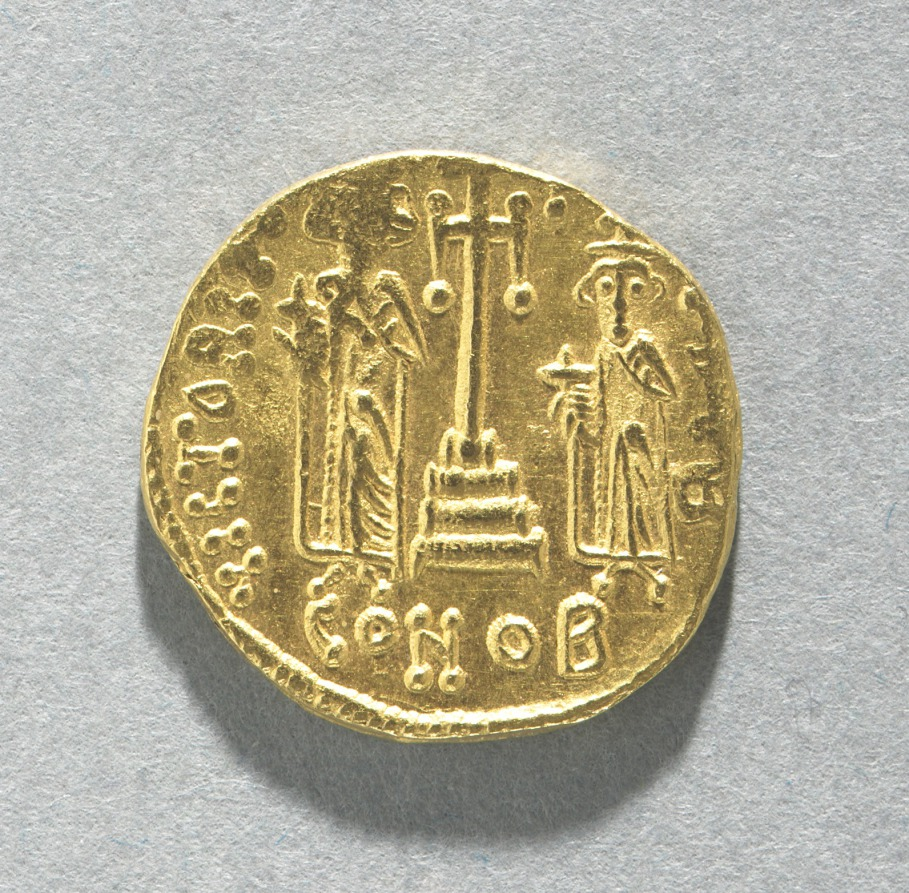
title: Solidus of Constans II and Constantine IV with a Cross Potent on Three Steps (reverse)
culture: Byzantium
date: 659–661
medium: gold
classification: Coins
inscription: VICTORIA AVGU and officina letter (cut off and incomplete)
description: The vast number of surviving Byzantine coins attests to the level of trade across the empire. Controlled and supervised by the emperor, the producers of coins took care to represent his authority and reflect his stature. Talented artists were recruited to engrave the dies (molds) used for the striking of coins. Emperors increasingly came to include their heirs and co-emperors on their coinage, as well as other family members or even earlier rulers. Coins were recognized, then as now, as small, portable works of art. With their inscriptions and images, Byzantine coins provide valuable documentation of historical events and a record of the physical appearance of the emperors. The coin shown here is the solidus, the basic gold coin of 24 karats.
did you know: A cross potent is a form of the cross in which bars extend from each arm.